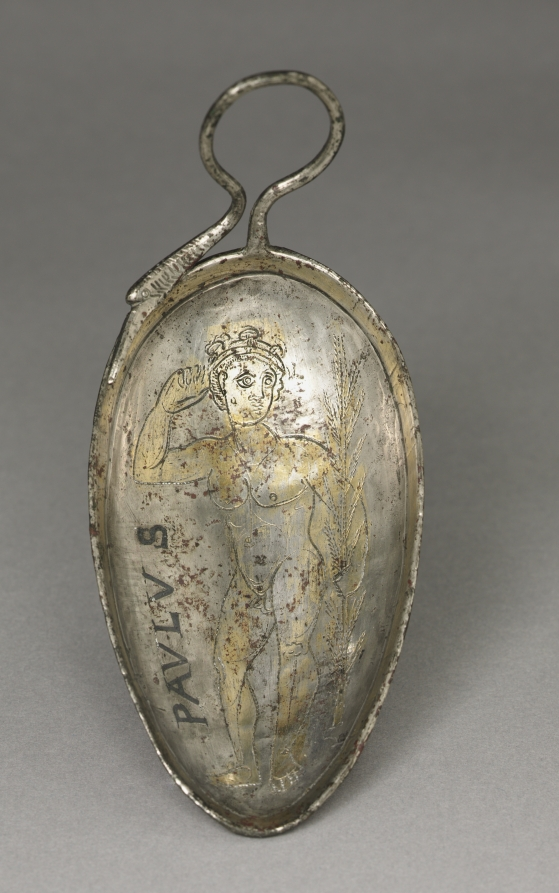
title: Spoon with Saint Paul as an Athlete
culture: late Roman Empire, perhaps Syria, early Byzantine, 4th century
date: 350–400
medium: silver, silver gilt, and niello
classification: Metalwork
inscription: the interior of the bowl contains an inscription filled with niello giving the Latin name of "PAVLVS."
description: Silver spoons with swan neck handles (ligulae) were popular in the Late Roman Empire. This late antique spoon is unique because it is decorated with the nude figure of a victorious athlete identified in an inscription as PAVLVS (Paul). It is tempting to interpret the juxtaposition of the name with a classical representation of an athlete as a subtle allusion to a passage in Saint Paul’s first letter to the Corinthians (1 Cor. 9:24-27), in which the apostle characterizes himself as an "athlete of Christ." While this interpretation may imply that the spoon’s owner was a Christian, it does not imply a religious function for the object, which was likely used for display or fine dining.